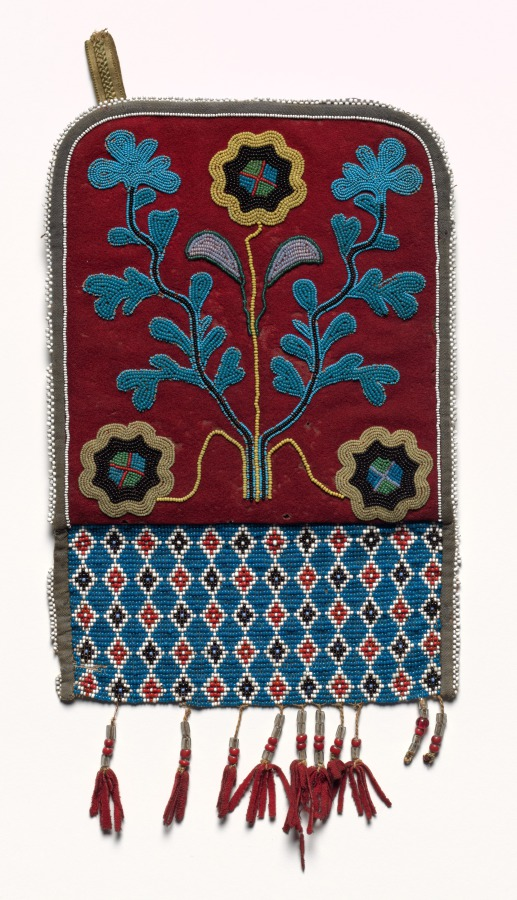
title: Bag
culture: Plains or Northeastern Woodlands, Nehiyawak (Cree) or Metis People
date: 1850–1900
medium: beadwork on cloth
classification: Textile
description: This colorful bag is beaded on both sides. On one side, the flowers resemble the sun, which native peoples of the Woodlands regard as the supreme spirit; the visual parallel is probably intentional. On the other side, a different plant symmetrically spreads its leaves and flowers across a dark, contrasting ground.